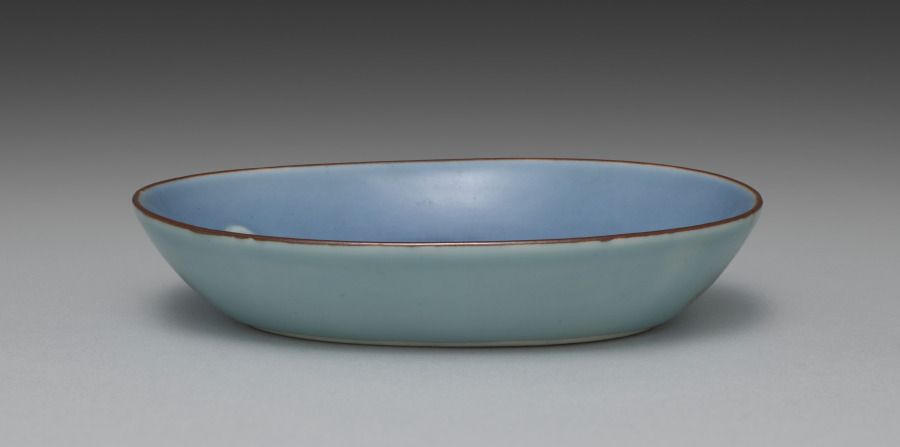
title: Dish from Dishes with Shells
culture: Japan, Meiji period (1868–1912) or Taishō period (1912–26)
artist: Seifū Yohei IV (Japanese, 1872–1951)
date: 1914–46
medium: One from a set of five dishes; porcelain with blue glaze, iron oxide, and molded design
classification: Ceramic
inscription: 清風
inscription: 清風造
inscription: 清風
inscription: 成山清風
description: Yohei IV chose an aquatic theme for this set of five mukōzuke, side dishes. He added an iron oxide rim and used a concentrated blue glaze on both the interior and exterior. The glaze, named on the box lid, is his father’s “evening moon” (tsukiyoi) color. The conch in relief takes up the entire bottom of the dish. Up the sides are two snails on one end and on the other a scallop. This results in a boldly graphic, less realistic effect.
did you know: This set of dishes, mukōzuke, could be used for serving small side dishes at a tea gathering.